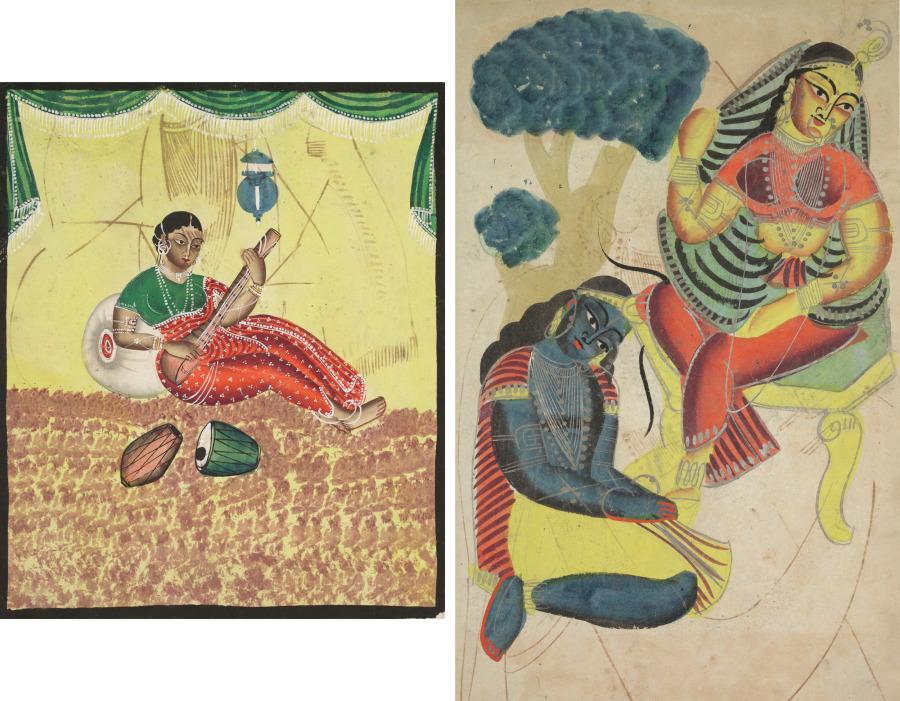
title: Leaf from a Kalighat album: Woman Playing Music (recto); Krishna Stroking Radha's Feet (verso)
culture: Eastern India, Bengal, Kolkata, Kalighat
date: c. 1890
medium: Gum tempera, graphite, and ink on paper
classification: Painting